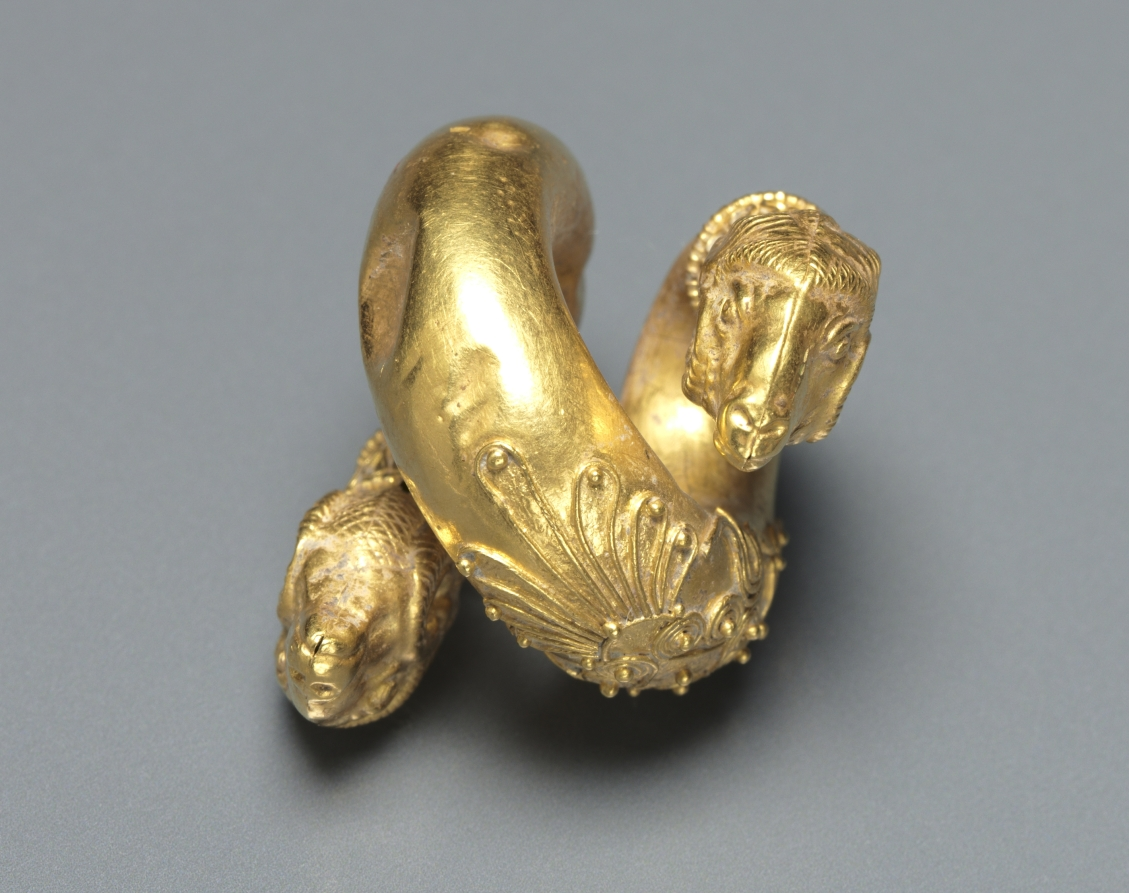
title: Hair Ringlet with Ram Head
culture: Greece, Hellenistic period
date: 400s BCE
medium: gold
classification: Jewelry